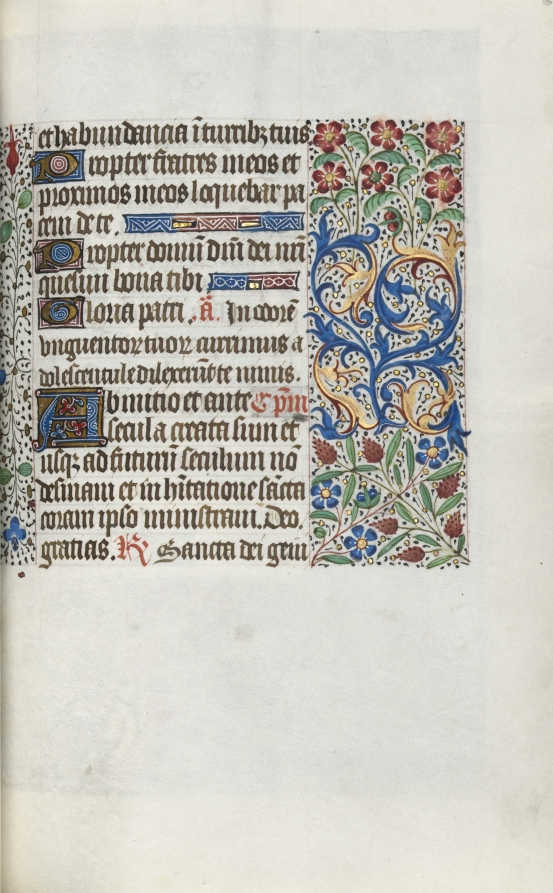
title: Book of Hours (Use of Rouen): fol. 63r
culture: France, Rouen, 15th century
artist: Master of the Geneva Latini (French, active Rouen, 1460–80)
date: c. 1470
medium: ink, tempera, and gold on vellum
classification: Bound Volume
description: In the late 1400s and early 1500s Rouen was an established and important center of book production. The city’s cathedral had a wealthy chapter that spent large sums of money to commission books and to maintain its extensive library. The stationers and booksellers would have likely been concentrated in or near the cathedral precinct. This artist, named after a manuscript now in Geneva, was Rouen’s principal illuminator during the second half of the 1400s.